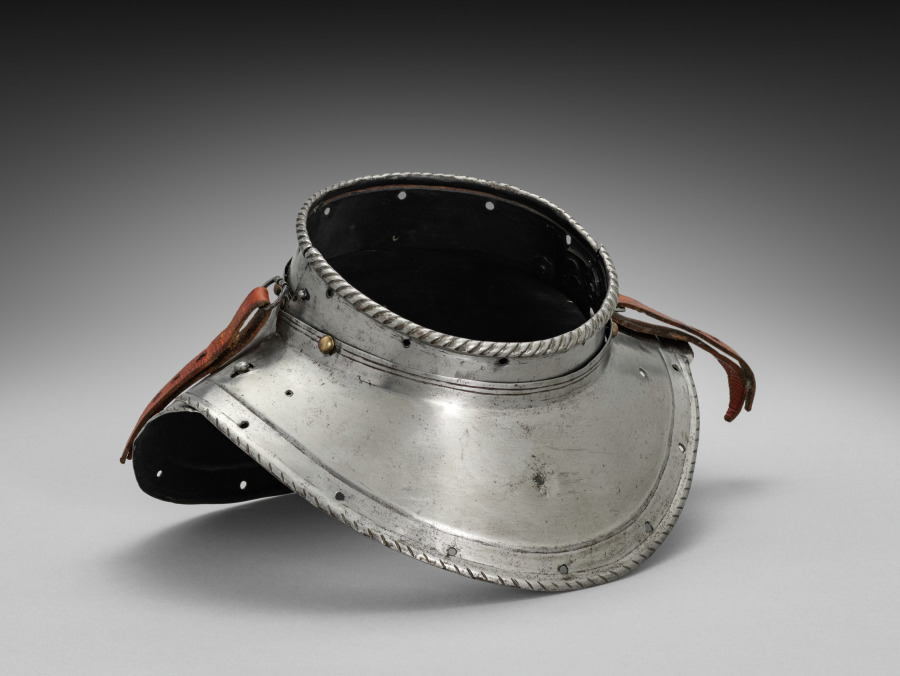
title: Colletin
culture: Germany, 19th century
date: 1801–1900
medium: steel with black paint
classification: Arms and Armor